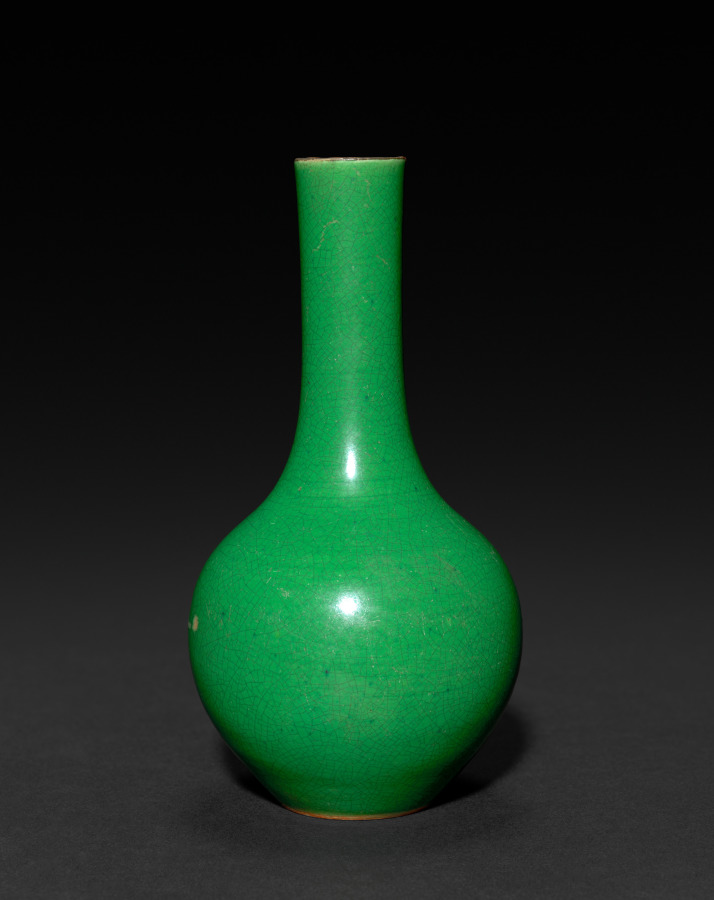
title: Bottle-Shaped Vase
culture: China, Qing dynasty (1644–1911), Qianlong reign (1736–95)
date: 1736–95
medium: porcelain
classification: Ceramic